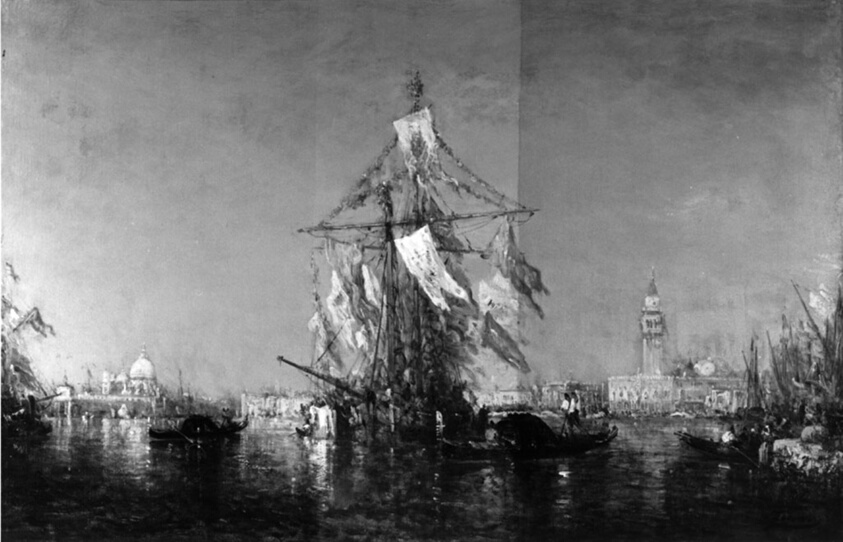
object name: Painting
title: Fête de Saint Marc, Venise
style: nineteenth century, 19th century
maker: Félix Ziem (French, 1821–1911)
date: 19th century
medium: Oil on canvas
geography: France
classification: painting; paint; oil on canvas; oil paintings (visual works); french; european painting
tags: Venice, Italy, yellow (color), white (color), water, red (color), men, Italy, flags, festivals, celebrations, buildings, building, boats, boatman